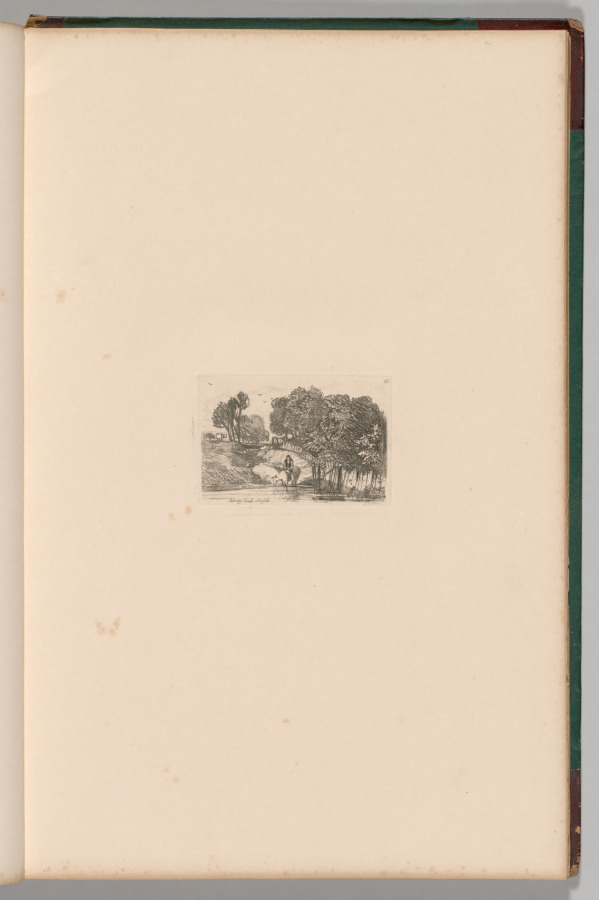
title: Liber Studiorum: Plate 20, Felbrigg Heath, Norfolk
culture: England, 19th century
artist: John Sell Cotman (British, 1782–1842)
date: 1838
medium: softground etching, from a bound volume containing 48 plates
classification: Bound Volume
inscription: In plate, within image, upper right: 20; in plate, below image: Felbrigg Heath, Norfolk; in plate, lower right, below image: J S Cotman